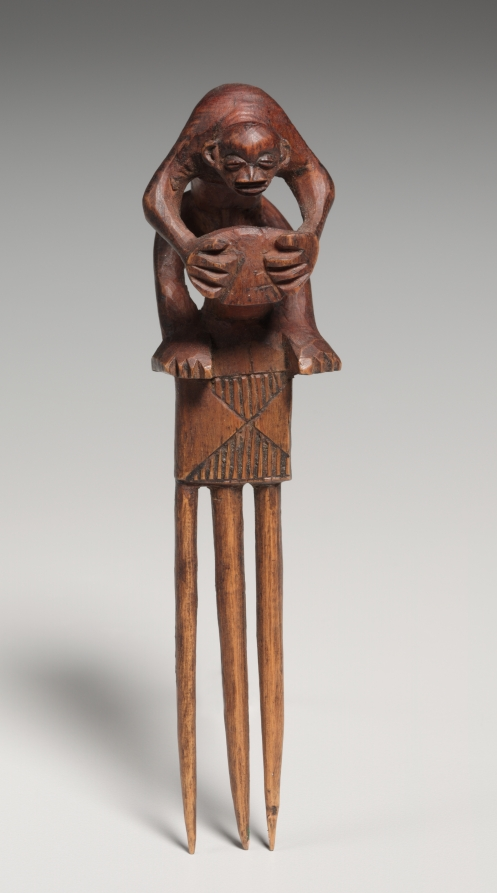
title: Comb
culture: Central Africa, Democratic Republic of the Congo or Angola, Chokwe, 20th century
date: c. 1910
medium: Wood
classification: Tool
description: Several combs demonstrate a diversity of form and treatment. One (1976.180), a vigorously carved work showing a powerful drummer in performance, is an excellent example of Chokwe artistry meant for female patrons.